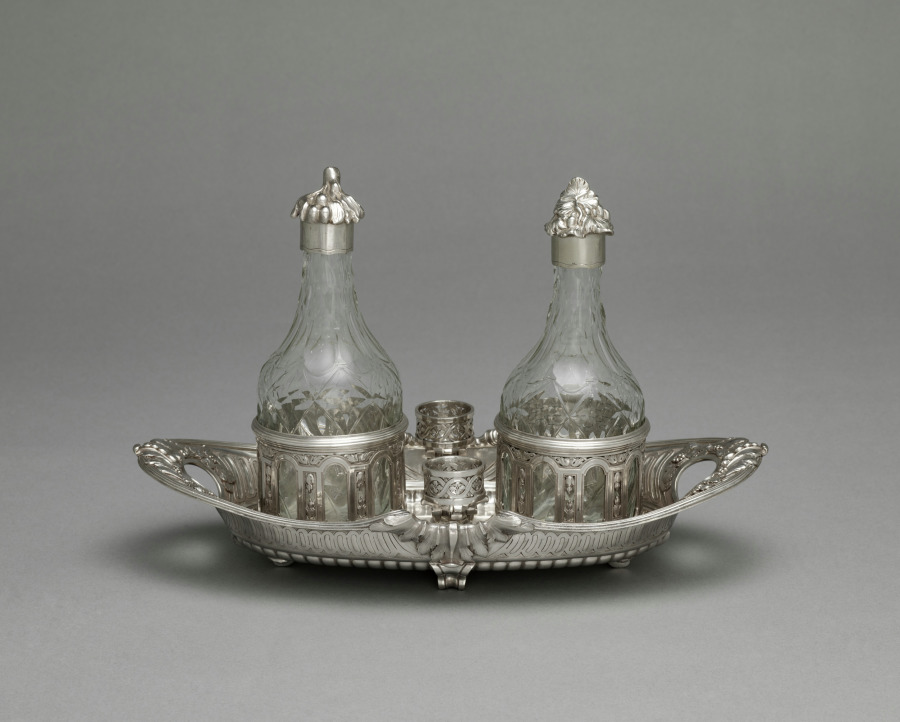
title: Cruet Stand (Huilier)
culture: France, 18th century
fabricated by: Robert Joseph Auguste (French, 1723–after 1795)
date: 1766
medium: silver and glass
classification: Silver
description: These bottles would have held oil and vinegar. Their silver stoppers, decorated with grapes and the leaves of vines, hint at their function. Master goldsmith Robert-Joseph Auguste was known for his silverwork in the neoclassical style. This style is present on the supports for these bottles whose stylized columns and scrollwork pull inspiration from the art of classical antiquity.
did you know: In 1778, Robert-Joseph Auguste received the title orfèvre ordinaire du roi, becoming the principal goldsmith for the royal court of King Louis XVI.